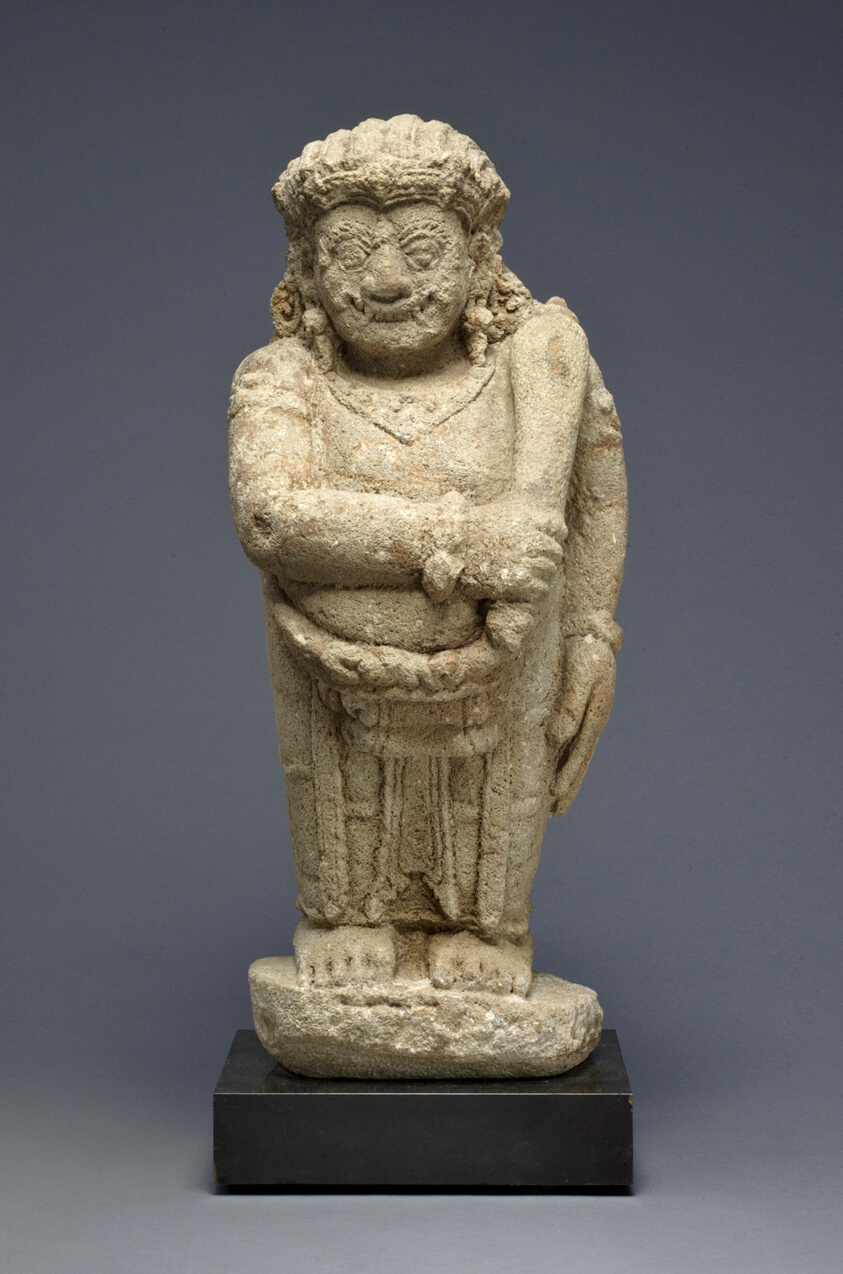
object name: Sculpture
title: Guardian Figure (Dvarapala)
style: Southeast Asian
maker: Indonesia; Eastern Java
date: c. 15th century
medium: Andesite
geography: Eastern Java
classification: stone (unidentified); stone; sculpture; asian art